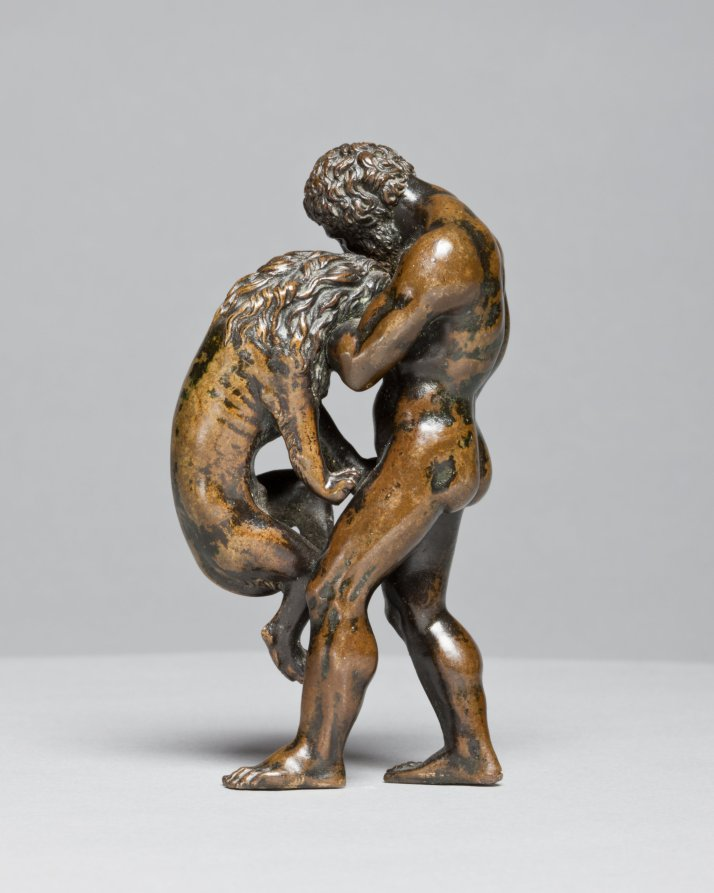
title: Hercules and the Nemean Lion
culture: Italy or France, 16th century or later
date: 1500s or later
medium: bronze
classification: Sculpture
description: The original owner of this work would have understood that this scene referred to the entire story of Hercules, the demi-god who had to accomplish twelve labors. The lion is named after the city of Nemea, near Corinth, a monstrous beast sent by the goddess Hera to wreak havoc on the area. After killing the lion, Hercules wore his pelt, commonly seen in other representations of the hero.